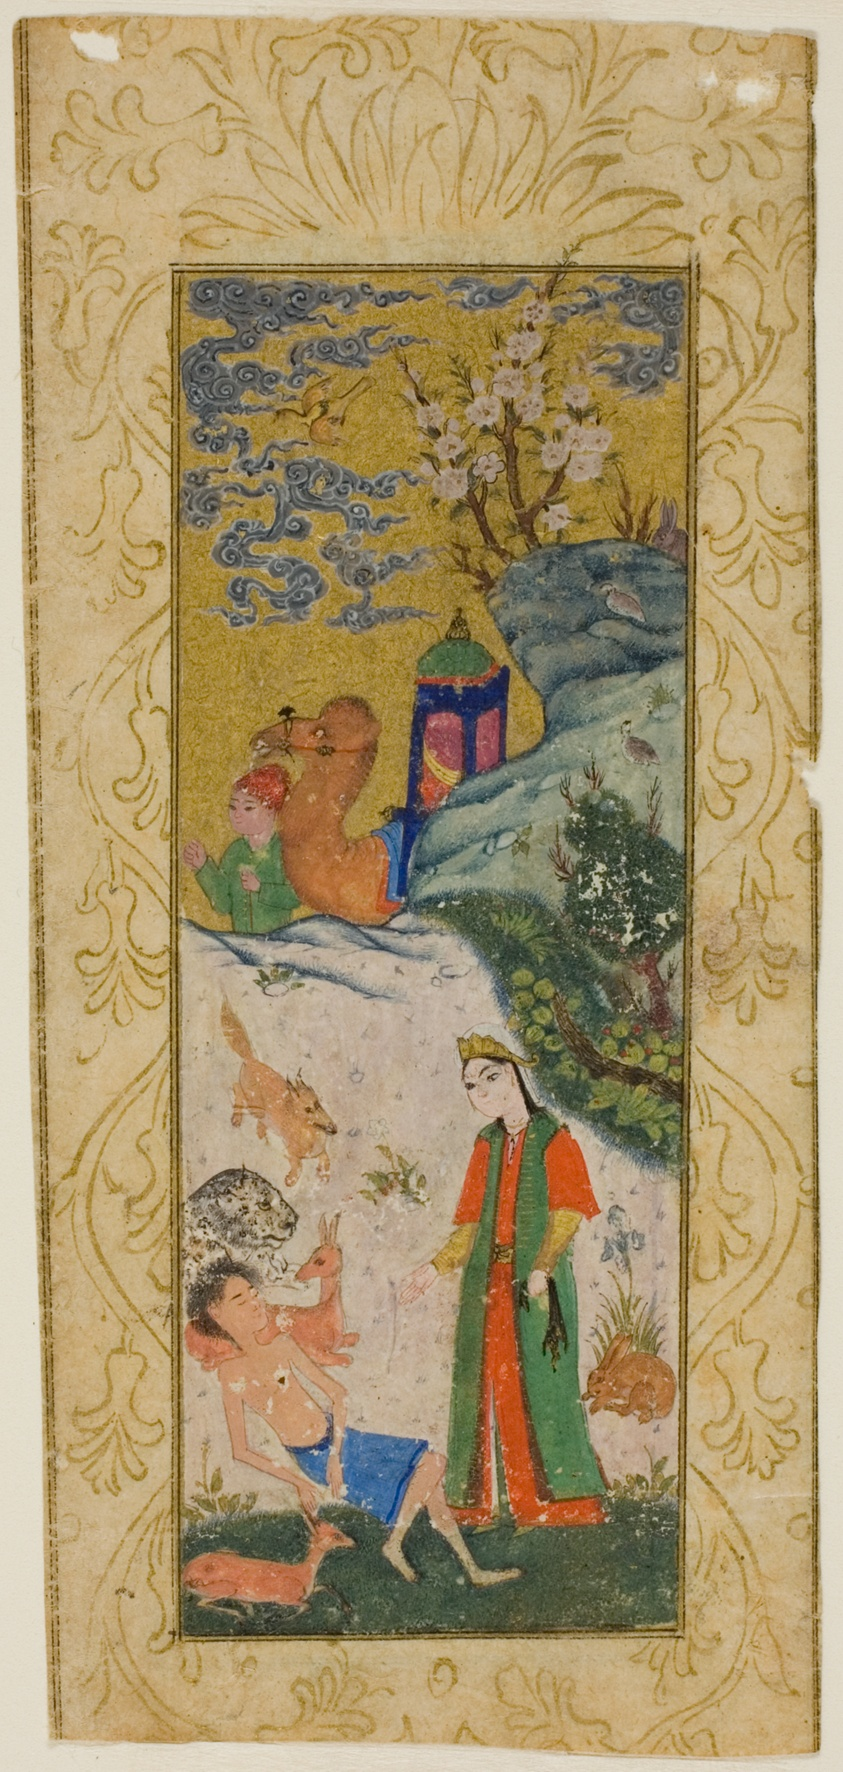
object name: Painting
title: Layla Visiting Majnun in the Desert, page from a copy of the Khamsa of Nizami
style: Islamic (culture or style)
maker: Iran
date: Safavid dynasty (1501–1722), 16th century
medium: Ink and color on paper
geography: Iran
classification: gouache; painting; asian art